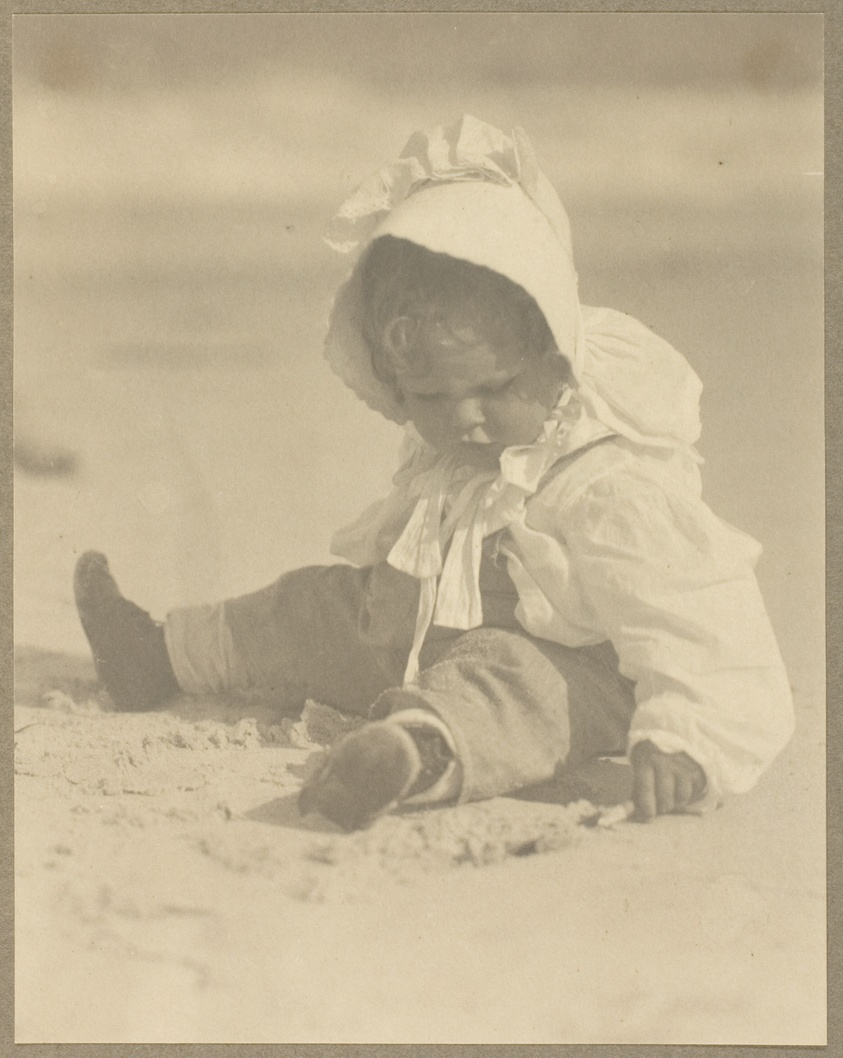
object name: Photograph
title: Aileen Flannery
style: Pictorialism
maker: Alfred Stieglitz (American, 1864–1946)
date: 1902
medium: Platinum print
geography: United States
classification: platinum print; photographic process; photography; photograph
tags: Collected by Hugh Edwards